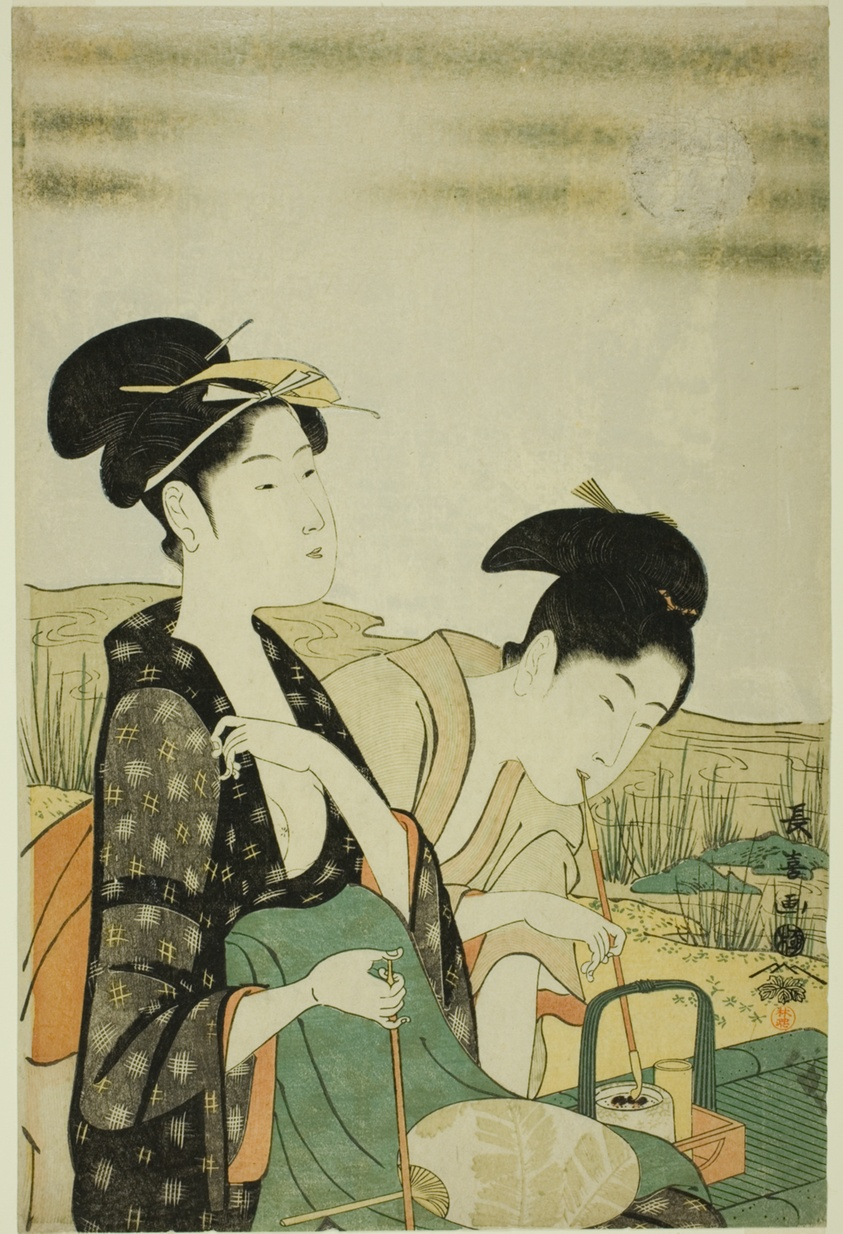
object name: Print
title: Moon viewing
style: Japanese (culture or style)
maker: Eishosai Choki (Japanese, active c. 1790s-early 1800s)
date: c. 1794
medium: Color woodblock print; oban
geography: Japan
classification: woodblock print; print; asian art